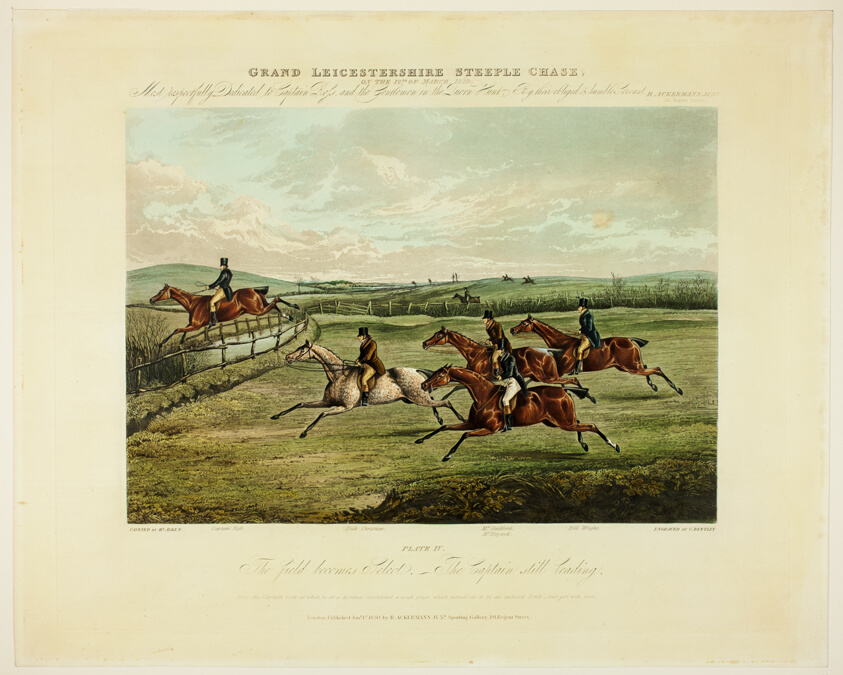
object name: Print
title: The Field becomes Select, from The Grand Steeplechase over Leicestershire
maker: Charles Bentley (English, 1806-1854); after Henry Alken (English, 1785-1851); published by R.A. Ackermann (English, 1764-1834)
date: published 1830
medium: Color aquatint on paper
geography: England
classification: aquatint; print; prints and drawing